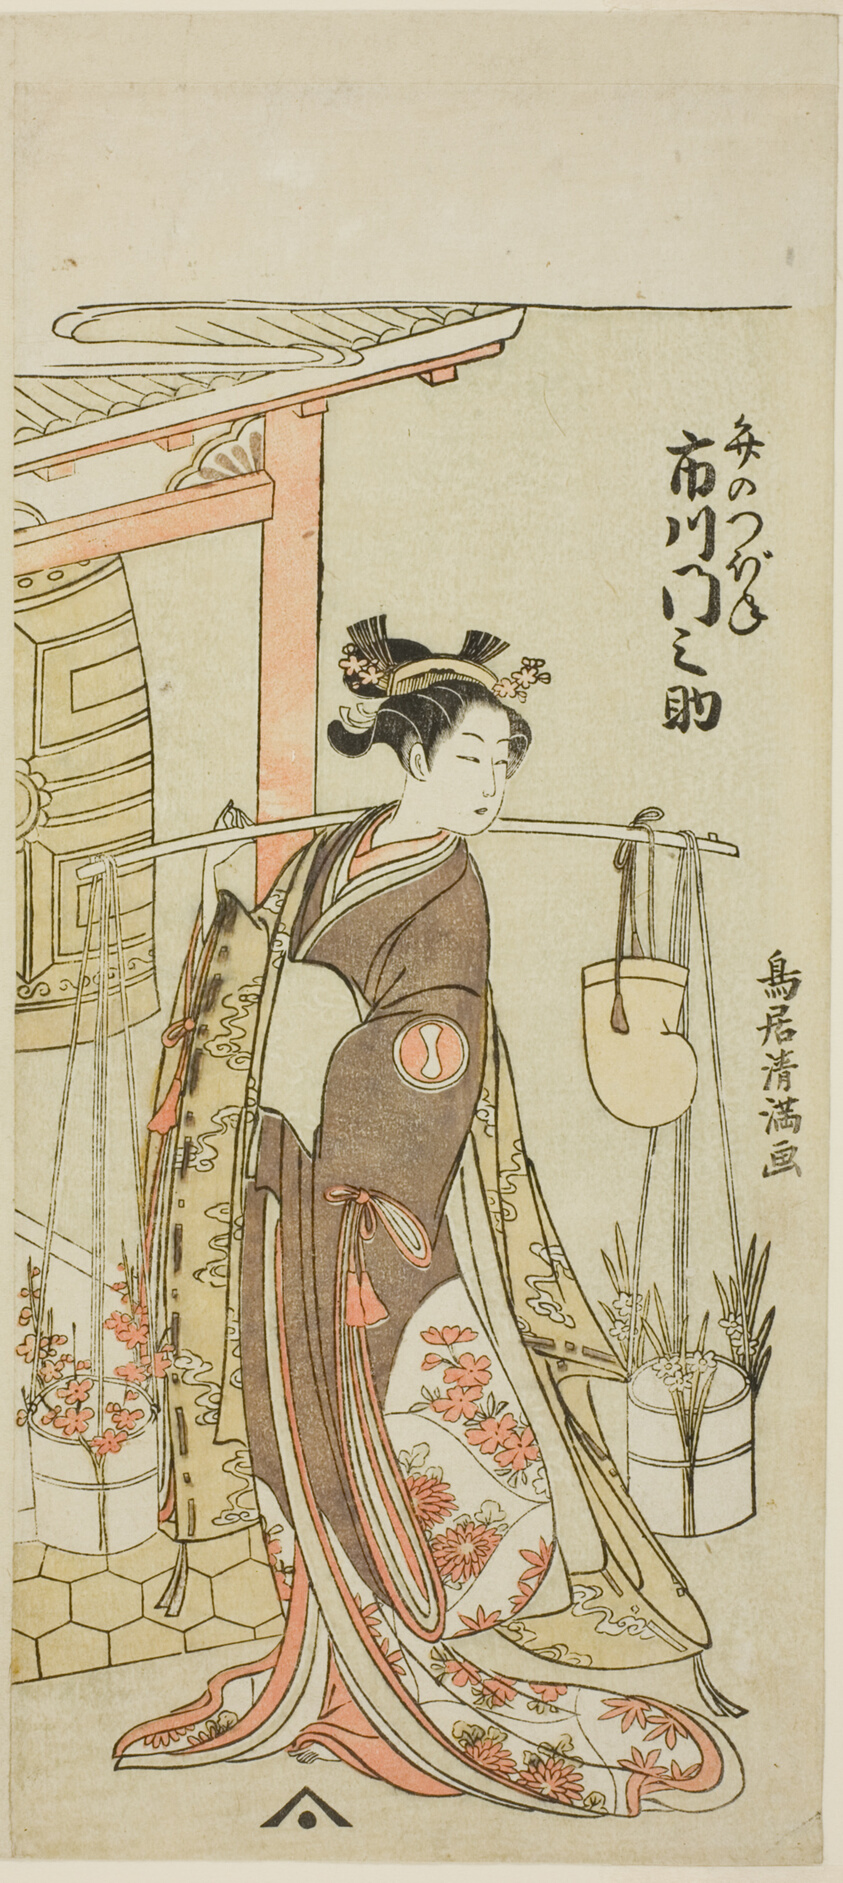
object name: Print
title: Actor Ichikawa Monnosuke II as the Lady of the Hairpin (Ichikawa Monnosuke Kogai no Tsubone)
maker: Torii Kiyomitsu; Japanese, 1735-1785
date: about 1760s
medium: Color woodblock print; hosoban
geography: Japan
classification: woodblock print; print; asian art